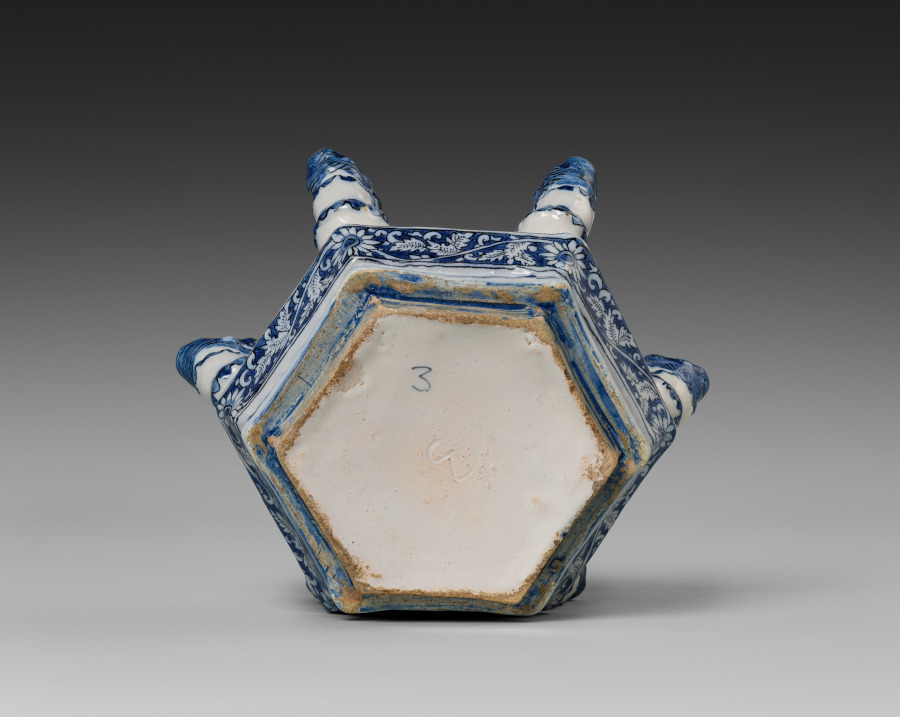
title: Third Tier for a Flower Pyramid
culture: Netherlands, Holland, Delft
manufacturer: Adrianus Kocx (Dutch, active 1686–1701)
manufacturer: De Grieksche A (The Greek A) Factory (Netherlands, 1658–1811)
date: c. 1690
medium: Tin-glazed earthenware, painted in blue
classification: Ceramic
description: Allegorical figures representing Faith, Hope, and Love decorate the base of this pyramid, on which rest six tiers with spouts where flowers can be placed. Flower pyramids are among the most complex and luxurious types of ceramics produced in Delft in the late 1600s. This example was made in the Greek A Factory, owned by Adrianus Kocx. During his tenure, the factory became the most prestigious of Delft potteries and received commissions from Queen Mary II, who ruled over England, Scotland, and Ireland together with her husband, William III. She contributed to the international spread of the fashion for Delft ceramics.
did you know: The iconic blue-and-white ceramics from Delft originated as an attempt to copy Chinese porcelain.